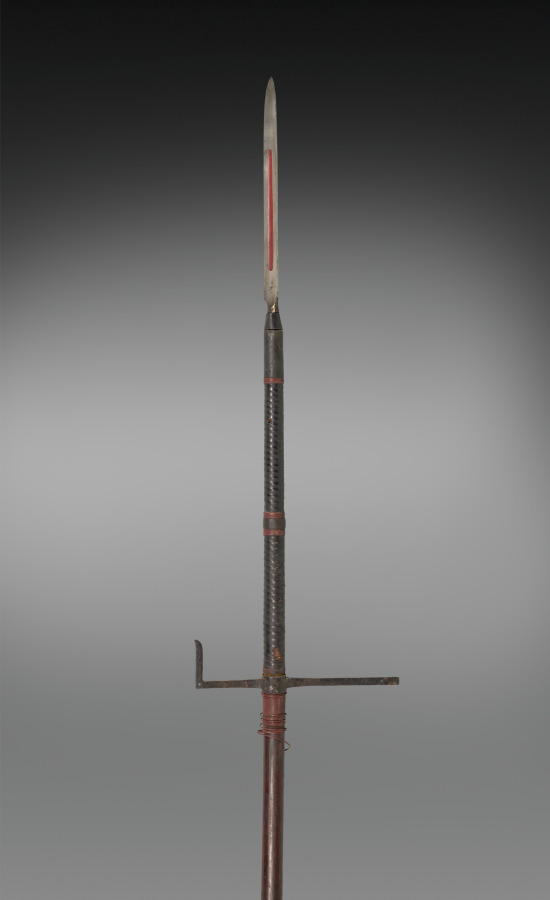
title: Spear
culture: Japan, Edo period (1615–1868)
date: 1700s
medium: wooden handle, metal blade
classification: Arms and Armor